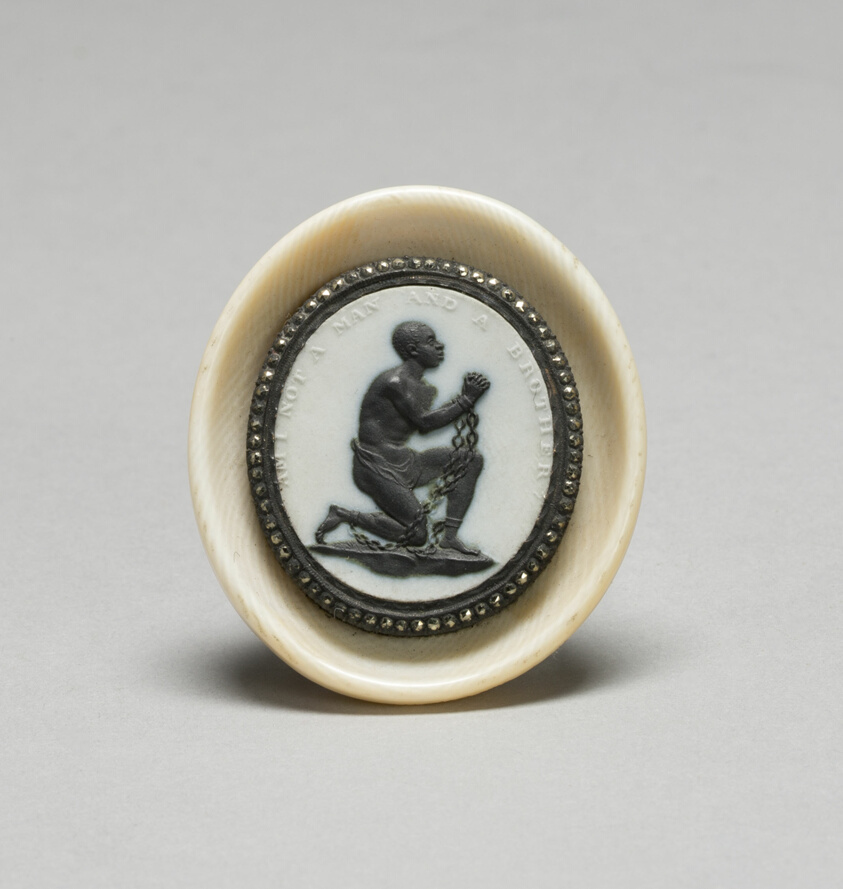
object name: Ceramics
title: Anti-Slavery Medallion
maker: Wedgwood Manufactory; England, founded 1759; Modeled by William Hackwood; English, c. 1753–1836; Etruria, Staffordshire, England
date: 1787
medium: Stoneware (jasperware and black basalt), cut steel, and ivory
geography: Burslem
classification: accessories (object genre); stoneware; european decorative arts; ceramics